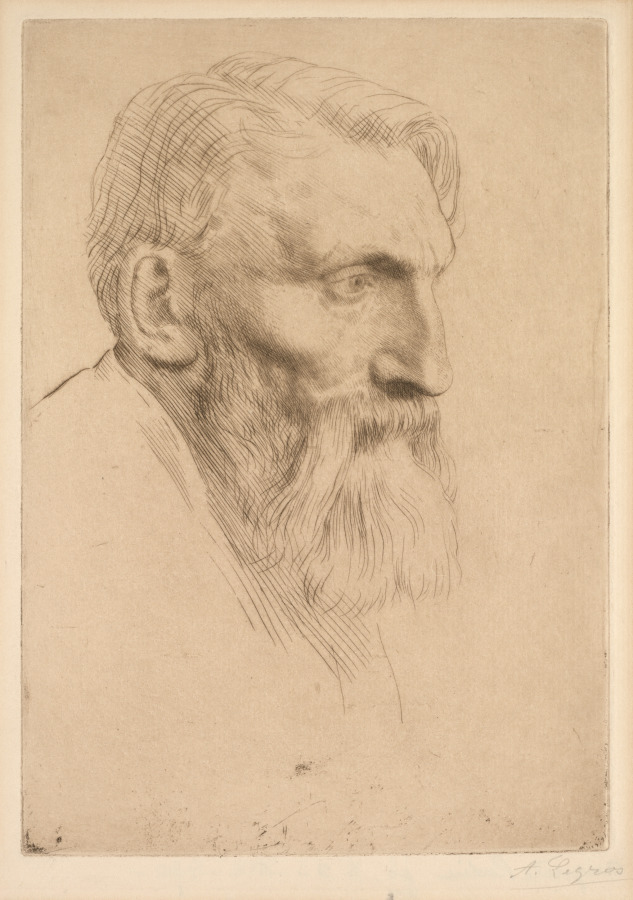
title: Auguste Rodin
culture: France, 19th century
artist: Alphonse Legros (French, 1837–1911)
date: 1881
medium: etching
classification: Print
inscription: lower right, in graphite: A. Legros